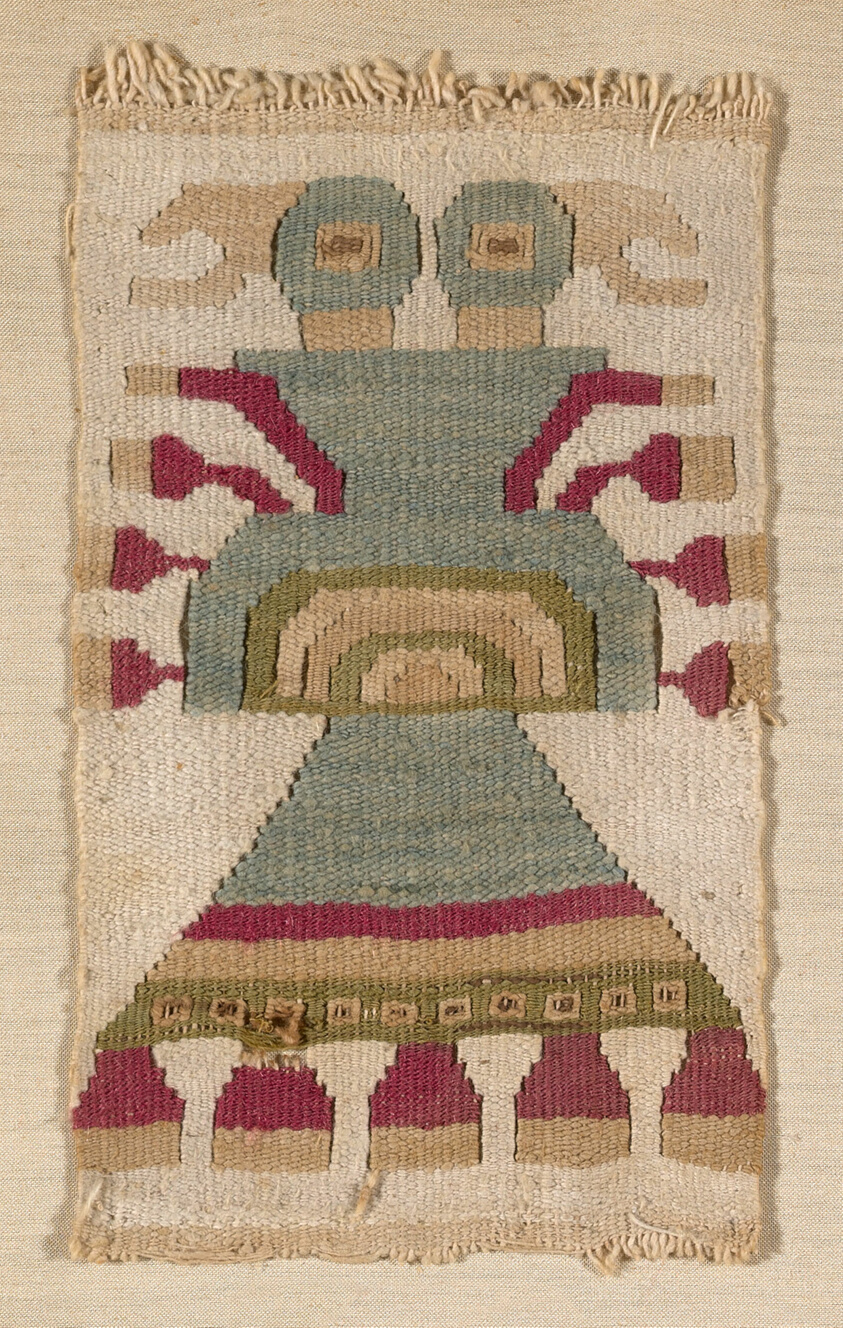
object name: Textile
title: Patch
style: lambayeque, Pre-Columbian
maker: Lambayeque (Peru, Probably north coast)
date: A.D. 1000/1476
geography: Peru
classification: textile; weaving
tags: birds, animals